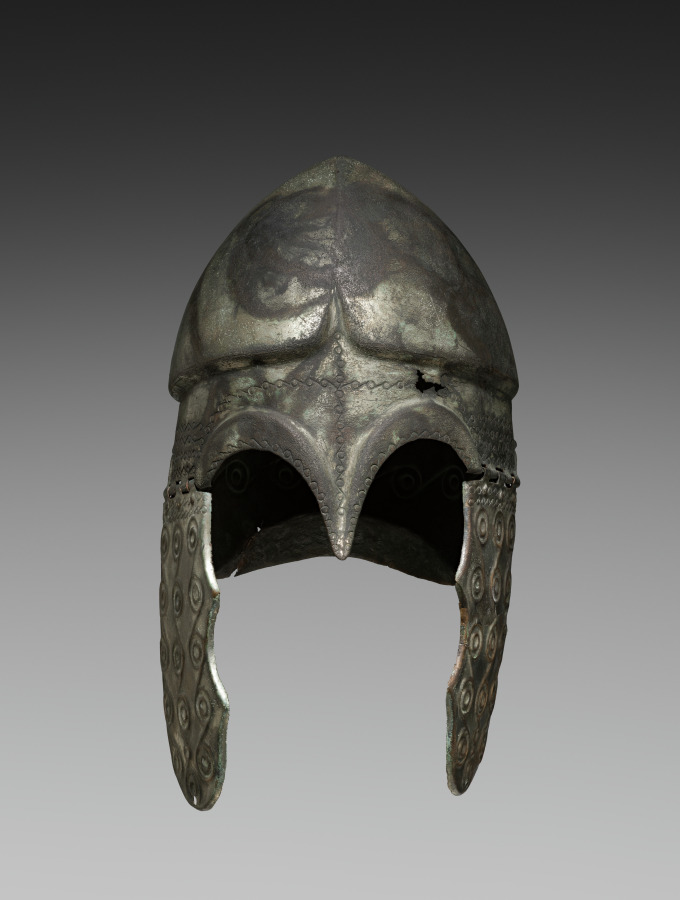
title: Chalcidian Helmet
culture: Greek (perhaps Black Sea area)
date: c. 350–200 BCE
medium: Tinned bronze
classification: Arms and Armor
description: Among ancient helmets, the Chalcidian type is varied, widespread, and comparatively unrestrictive, with relatively wide openings for the eyes and ears. This example, probably made in the Black Sea region or even further east, features a pointed noseguard, high carinated crown, molded brow ridge, and everted rear flange, plus large separately made hinged cheekpieces. The tinned bronze surface is almost silver in color, with extensive decoration including small incised linked scrolls and much larger embossed linked scrolls.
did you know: Although named for Chalcis, a city in Euboia, Chalcidean helmets were made across the Greek world.